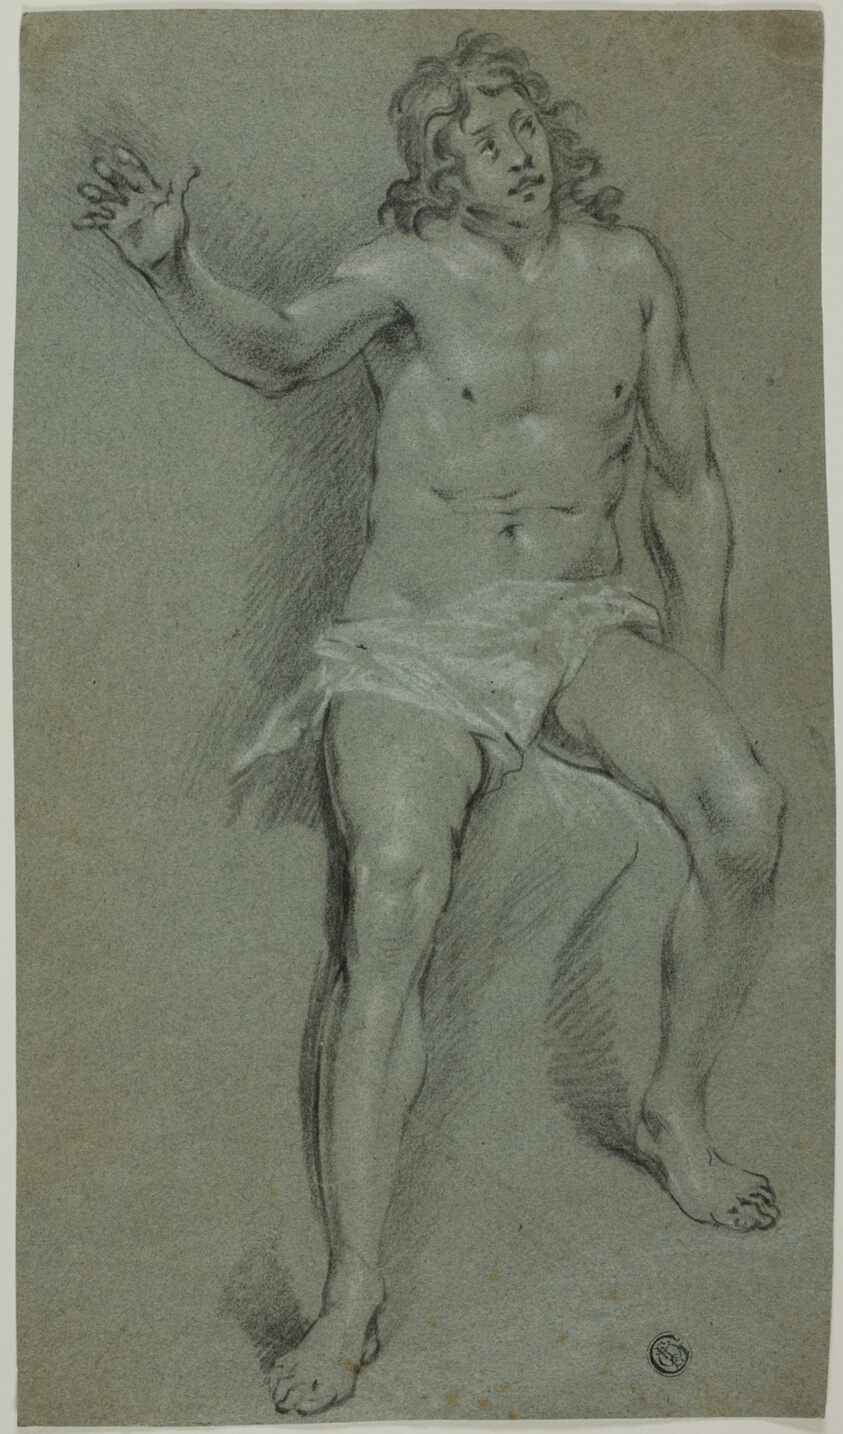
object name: Drawing and Watercolor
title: Seated Male Nude (recto); Sketches of Hand and Boy'd Head (verso)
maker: School of Rembrandt van Rijn (Dutch, 1606-1669); or possibly Jacob Adriaenzoon de Backer (Dutch, 1608-1651); or Matthäus Merian, the Younger (Swiss, 1621-1687); or in the Style of Govert Flinck (Dutch, 1615-1660)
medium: Black chalk, with touches of black crayon, heightened with white chalk (recto), and black chalk heightened with white chalk (verso), on blue laid paper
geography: Holland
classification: chalk; drawings (visual works); prints and drawing